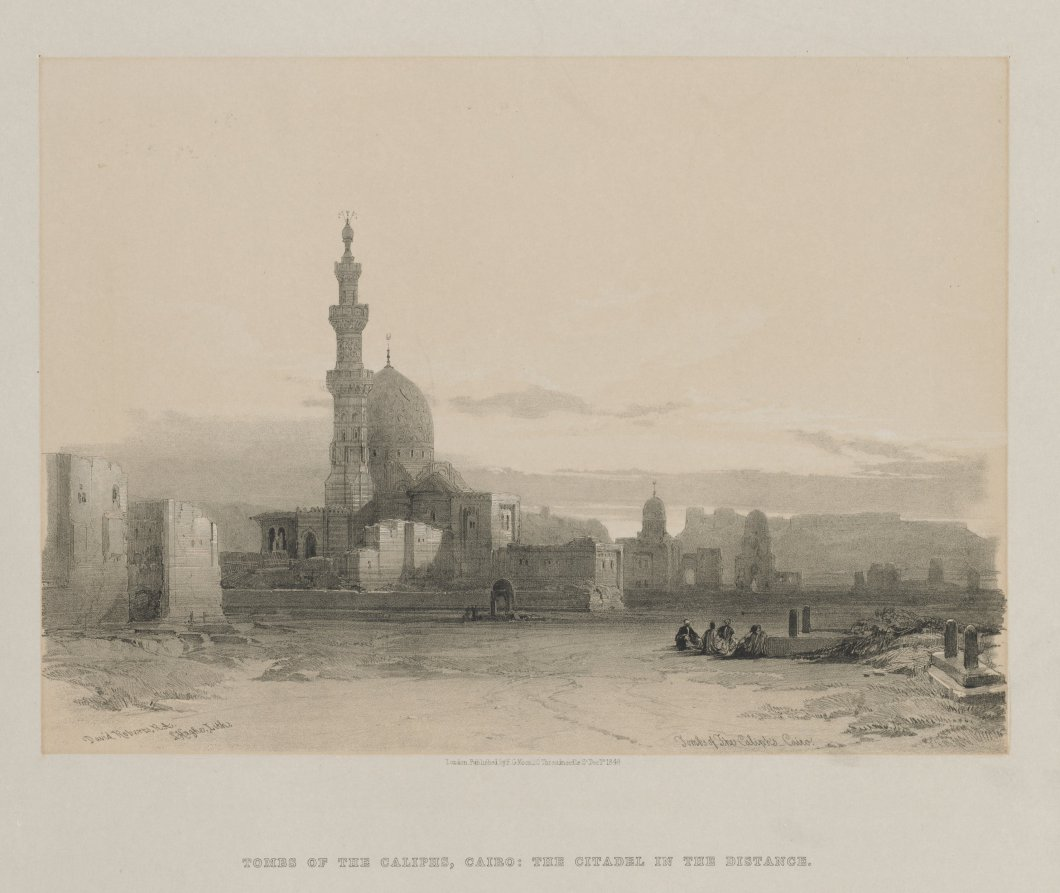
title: Egypt and Nubia, Volume III: Tombs of the Caliph's, Cairo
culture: England, 19th century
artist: Louis Haghe (British, 1806–1885)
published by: F. G. Moon, 20 Threadneedle Street, London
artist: after David Roberts (Scottish, 1796–1864)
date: 1848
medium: color lithograph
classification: Print